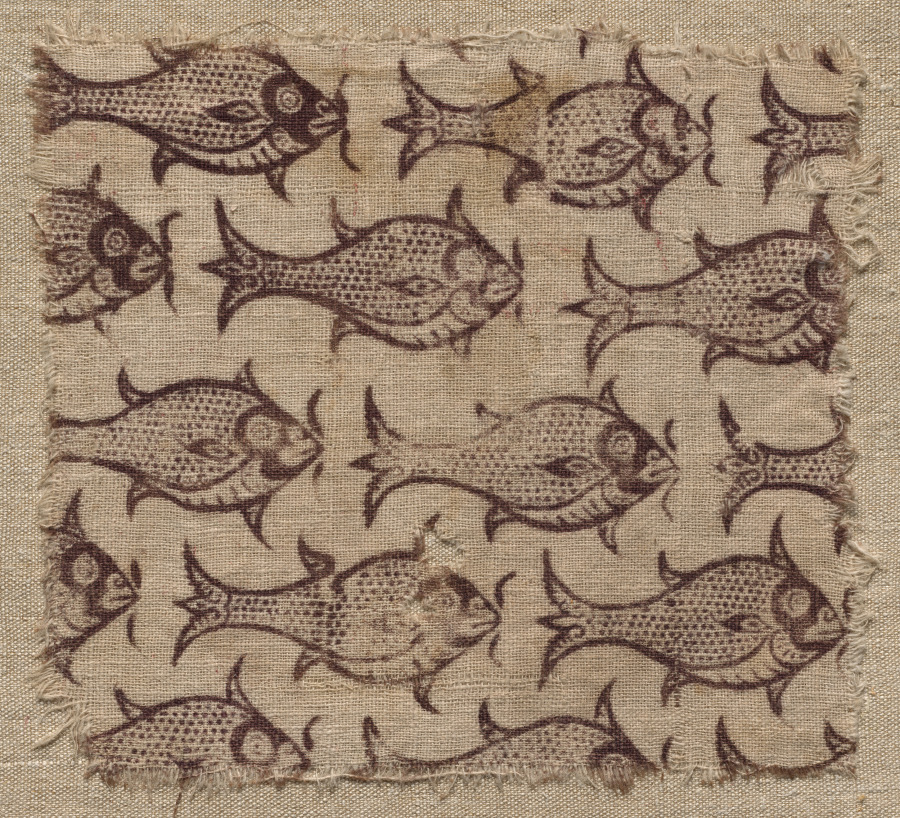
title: Fragment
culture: Egypt, Mamluk sultanate (1250–1517)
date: 1200s–1300s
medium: Block printing on plain weave cotton ground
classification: Textile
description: The Indian technique of patterning a textile by printing with carved woodblocks came to the Mamluk world as a result of trade with India. At Fustat, outside of Cairo, numerous fragments of Indian and Mamluk printed textiles have been found. Fish, repeated to form the entire design of this textile, were an indigenous Egyptian motif.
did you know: The break in the bodies of two of the fish reveals that two blocks were used to print each fish.